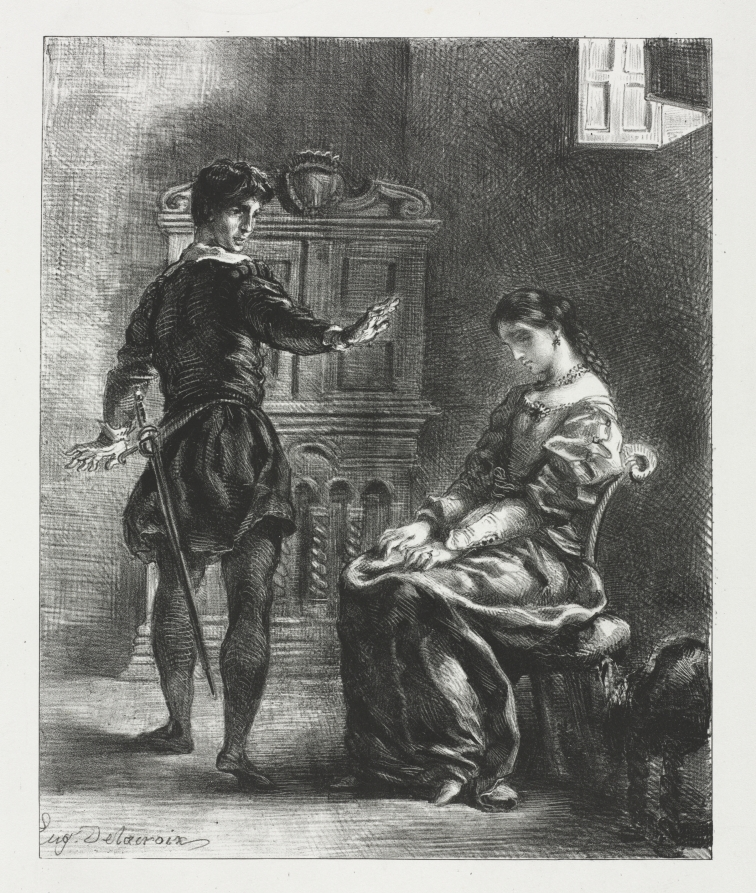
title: Hamlet: Hamlet and Ophelia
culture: France, 19th century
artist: Eugène Delacroix (French, 1798–1863)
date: 1834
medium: lithograph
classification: Print